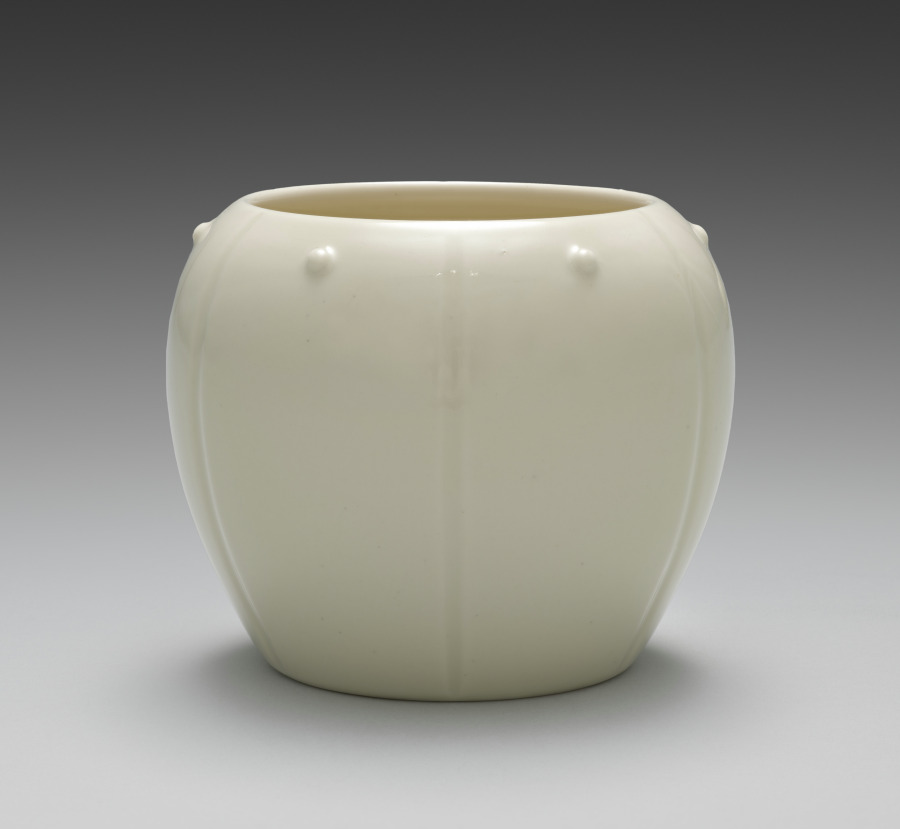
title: Container from Lit Charcoal and Ash Containers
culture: Japan, Meiji period (1868–1912)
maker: Seifū Yohei III (Japanese, 1851–1914)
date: 1893–1914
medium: One from a set of four containers; porcelain with molded design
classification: Ceramic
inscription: 清風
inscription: The storage box for this set is inscribed and impressed with seals.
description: The box lid for these six-lobed lit charcoal and ash containers, or hiire, identifies them as kōhakuji, another of Yohei III’s translucent cream colors over ivory clay bodies. One might translate the name as “lustrous pearl[–glazed ivory] porcelain.” A hiire was filled with ash with burnt coals at the center so that embers and tobacco ash could be discarded safely during a gathering. Each of the lobes on the containers has a round protrusion set below the rim. The studlike pattern is called ruiza. The term is also used to describe the pattern that rings the shoulder of some flower vases or metal kettles used in chanoyu.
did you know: The Seifu studio generally followed the standard practice in Japan for identifying the artist and object in box inscriptions.